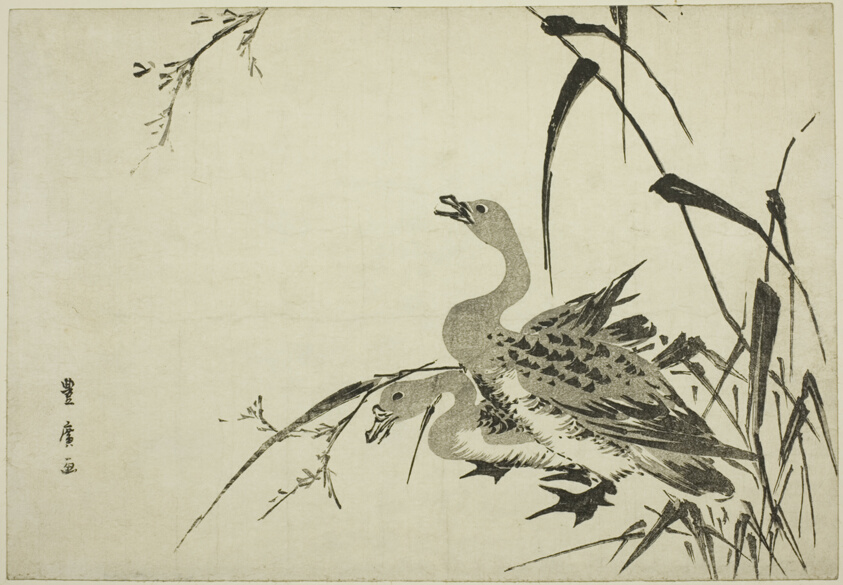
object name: Print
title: Wild Geese and Reeds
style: Japanese (culture or style)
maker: Utagawa Toyohiro (Japanese, 1773-1828)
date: About 1810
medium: Woodblock print; oban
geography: Japan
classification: woodblock print; print; asian art; woodblock